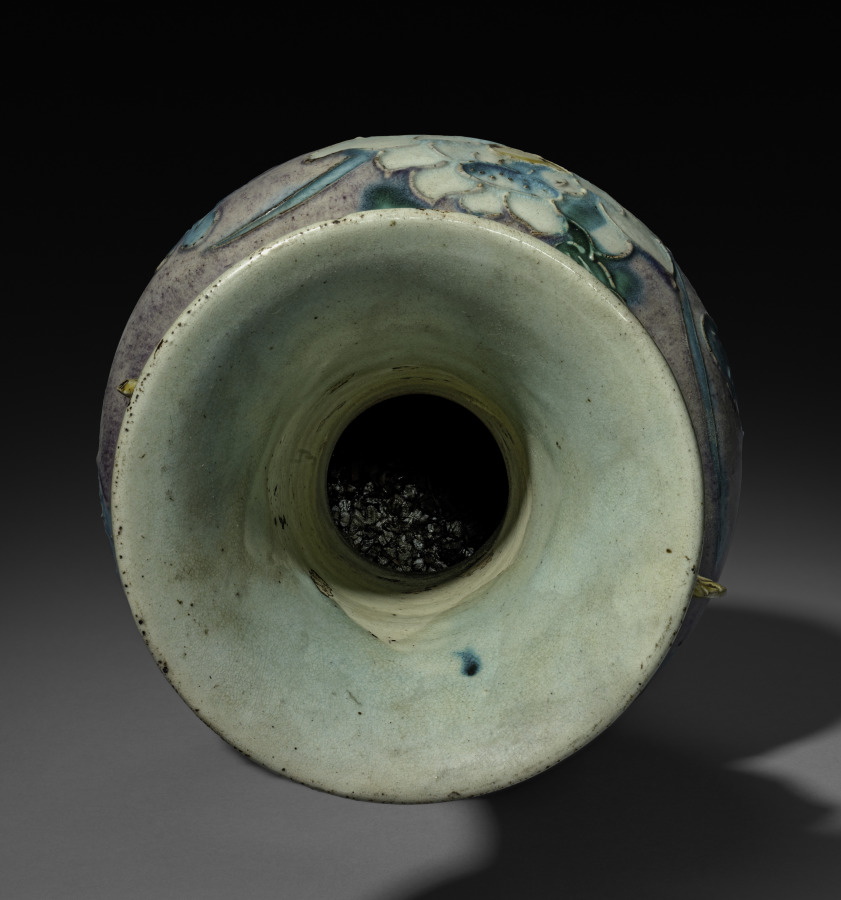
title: Beaker Vase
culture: China, Shanxi province, Ming dynasty (1368-1644)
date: 1368–1644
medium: Porcelain, Fahua ware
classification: Ceramic